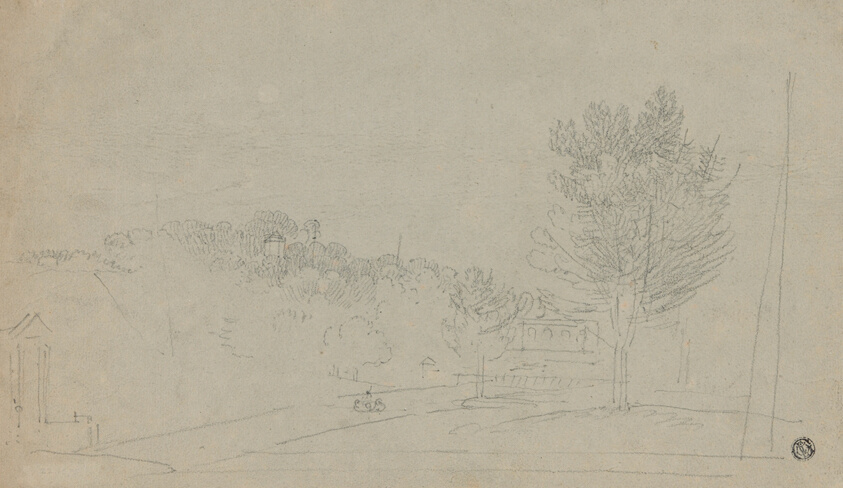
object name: Drawing and Watercolor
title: View of Wilson House and Gardens (recto); View of Wilson House and Gardens (verso)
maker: Richard Wilson (English, 1714-1782)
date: 1760/69 (recto); n.d. (verso)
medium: Black chalk (recto and verso) on gray laid paper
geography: England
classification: chalk; drawings (visual works); prints and drawing